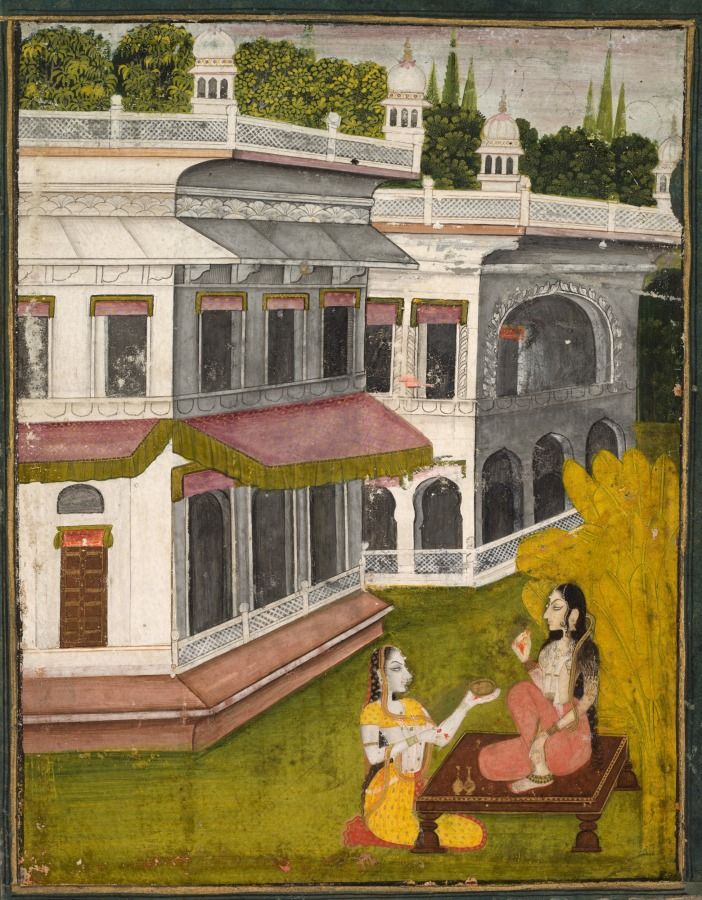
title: Lady and Her Confidante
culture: India, Kishangarh, early 19th Century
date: c. 1800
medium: color on paper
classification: Painting